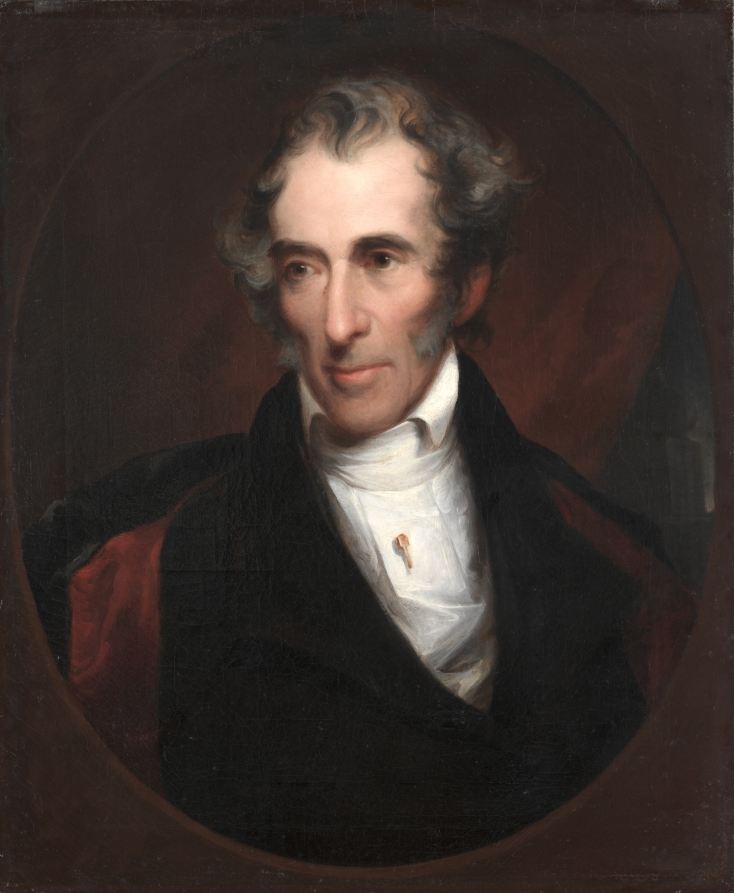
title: Martin Luther Hurlbut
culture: America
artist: John Neagle (American, 1796–1865)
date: 1840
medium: oil on canvas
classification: Painting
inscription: Inscribed on back: "Original portrait of M. L. Hurlbut Esq./ painted by John Neagle - Philad[a] Dec[r] 1840."